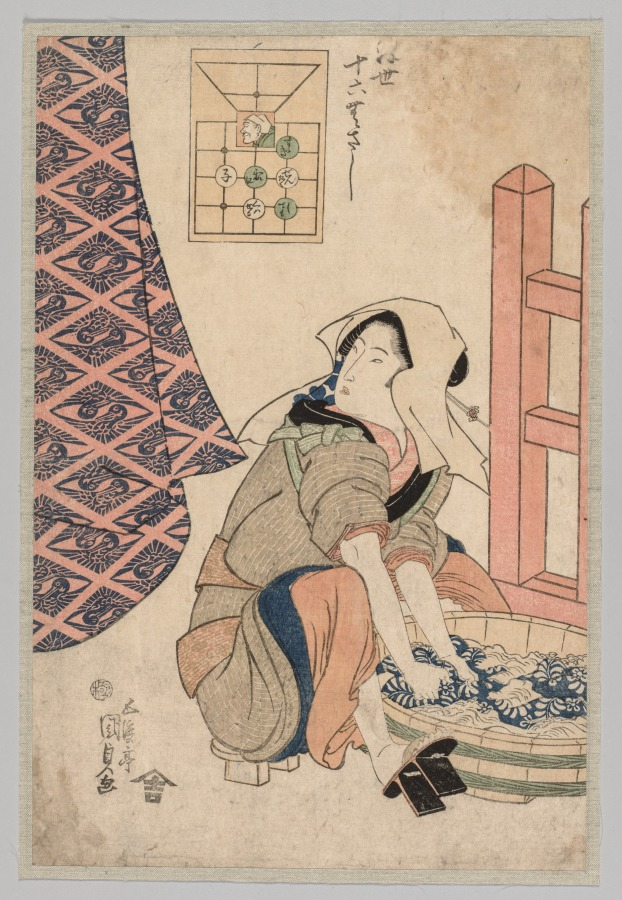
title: Seated Woman Washing Clothes in a Wooden Tub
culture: Japan, Edo period (1615–1868)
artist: Utagawa Kunisada (Japanese, 1786–1865)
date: 1786–1864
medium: color woodblock print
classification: Print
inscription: Signature: Gototei Kunisada